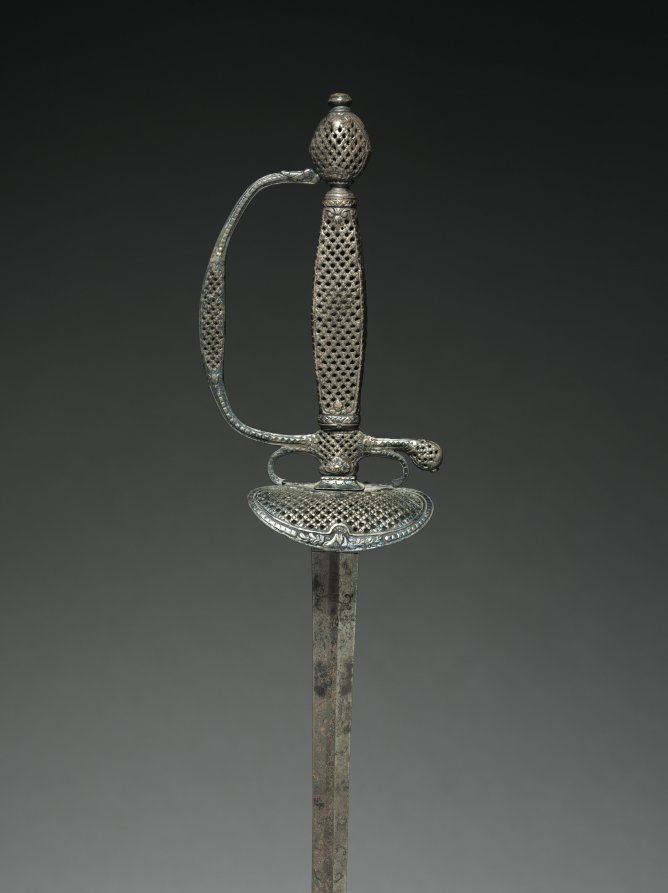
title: Child's Sword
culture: France, Paris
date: c 1780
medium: stainless steel, silver and brass wire inlay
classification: Arms and Armor